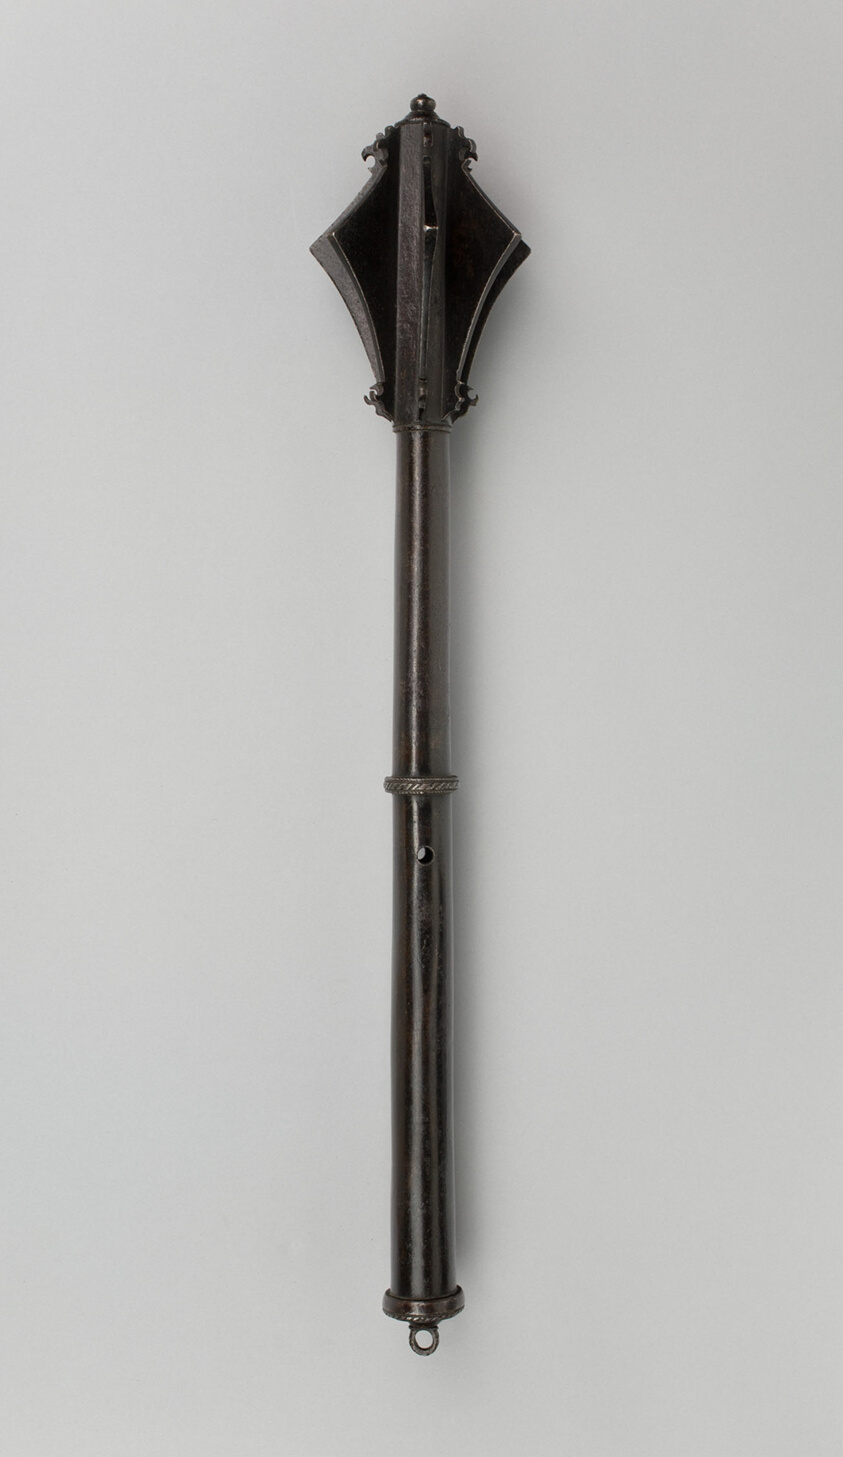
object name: Arms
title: Mace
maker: German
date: 1550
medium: Iron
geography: Germany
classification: shafted weapon; arms; arms and armor